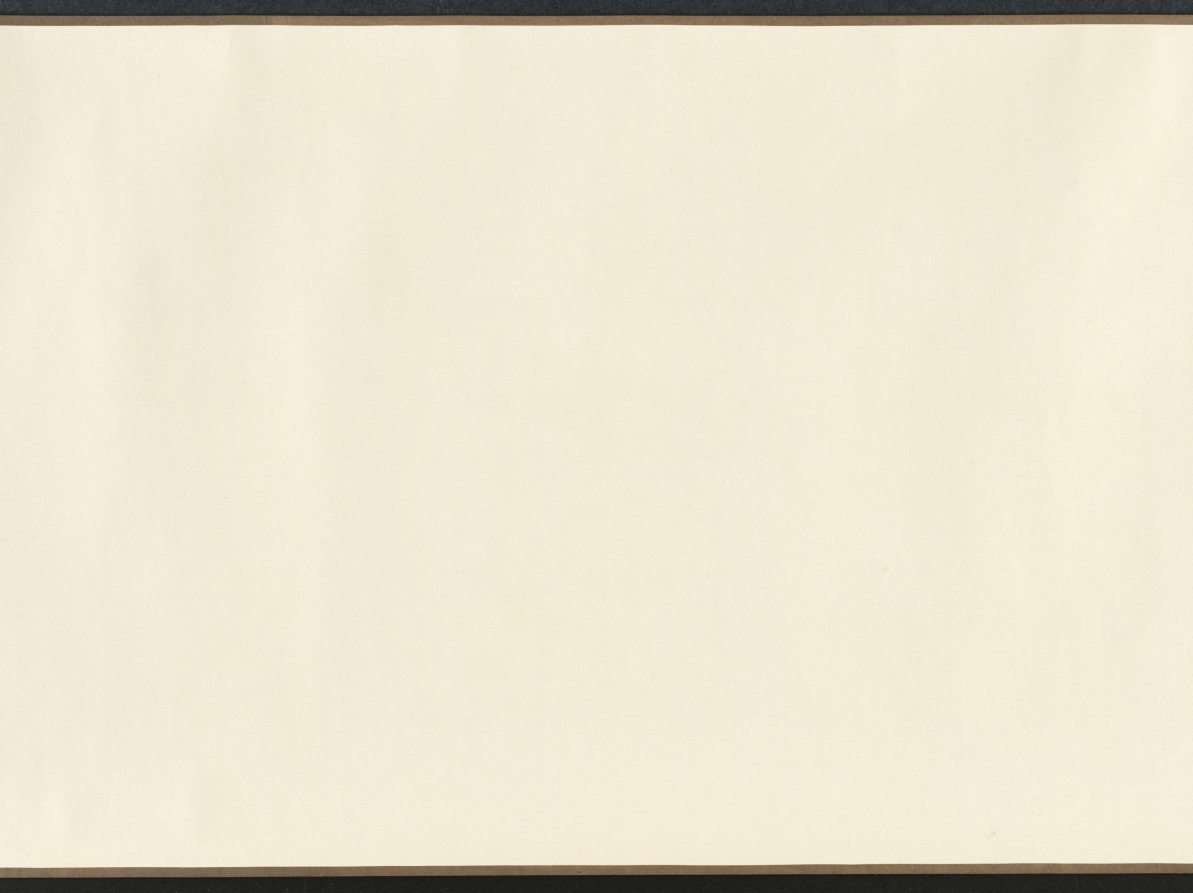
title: Ink Flowers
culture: China, Yuan dynasty (1271-1368)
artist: Zhao Zhong (Chinese, second half of the 1300s)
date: 1361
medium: Handscroll; ink on paper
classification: Painting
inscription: 寶帶同心結，香羅合歡扇。/ 繡作錦鴛鴦，雙雙為君獻。/ 薔薇露灑熏籠衣，馨香奉君君勿違。 原初并題。 [印] 趙衷原初畫記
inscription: 翠袂素羅韈，玉臺黃金盃。浩歌渡弱水。天風卷海三山開，麻姑方平為招飲，蛟宮獻舞銀濤堆。 原初并題。 [印] 雲林清趣、[印] 趙衷原初畫記。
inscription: 右用湯叔雅慶元中所寫墨花法作此卷，又效李長吉體賦詩以題之。詩與畫雖未工，要皆出於古人之餘，譬猶欲成方圓而必求其規矩之用也，識者毋誚焉！至正辛丑八月望日，東吳野人趙衷原初謹識。 [印] 趙原初、[印] 傳世清玩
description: Zhao Zhong's flowers, each paired with a poem, echo the fine-style colored flowers of the academic tradition, but instead he used only ink. Fine lines define the contours of each plant, as well as the veins within each petal and leaf. Careful ink washes give subtle modeling to the forms. The combination of lily, narcissus, and peony is unusual as the three belong to no known seasonal or symbolic system popular in the fourteenth century. Zhao’s medical training may have influenced the selection. Powdered lilies, for example, were prescribed to dispel grief, while the bark of tree peony roots was used as a treatment for various blood disorders.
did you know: This handscroll is a very rare example of ink flowers in the linear baimiao style of the fourteenth century.